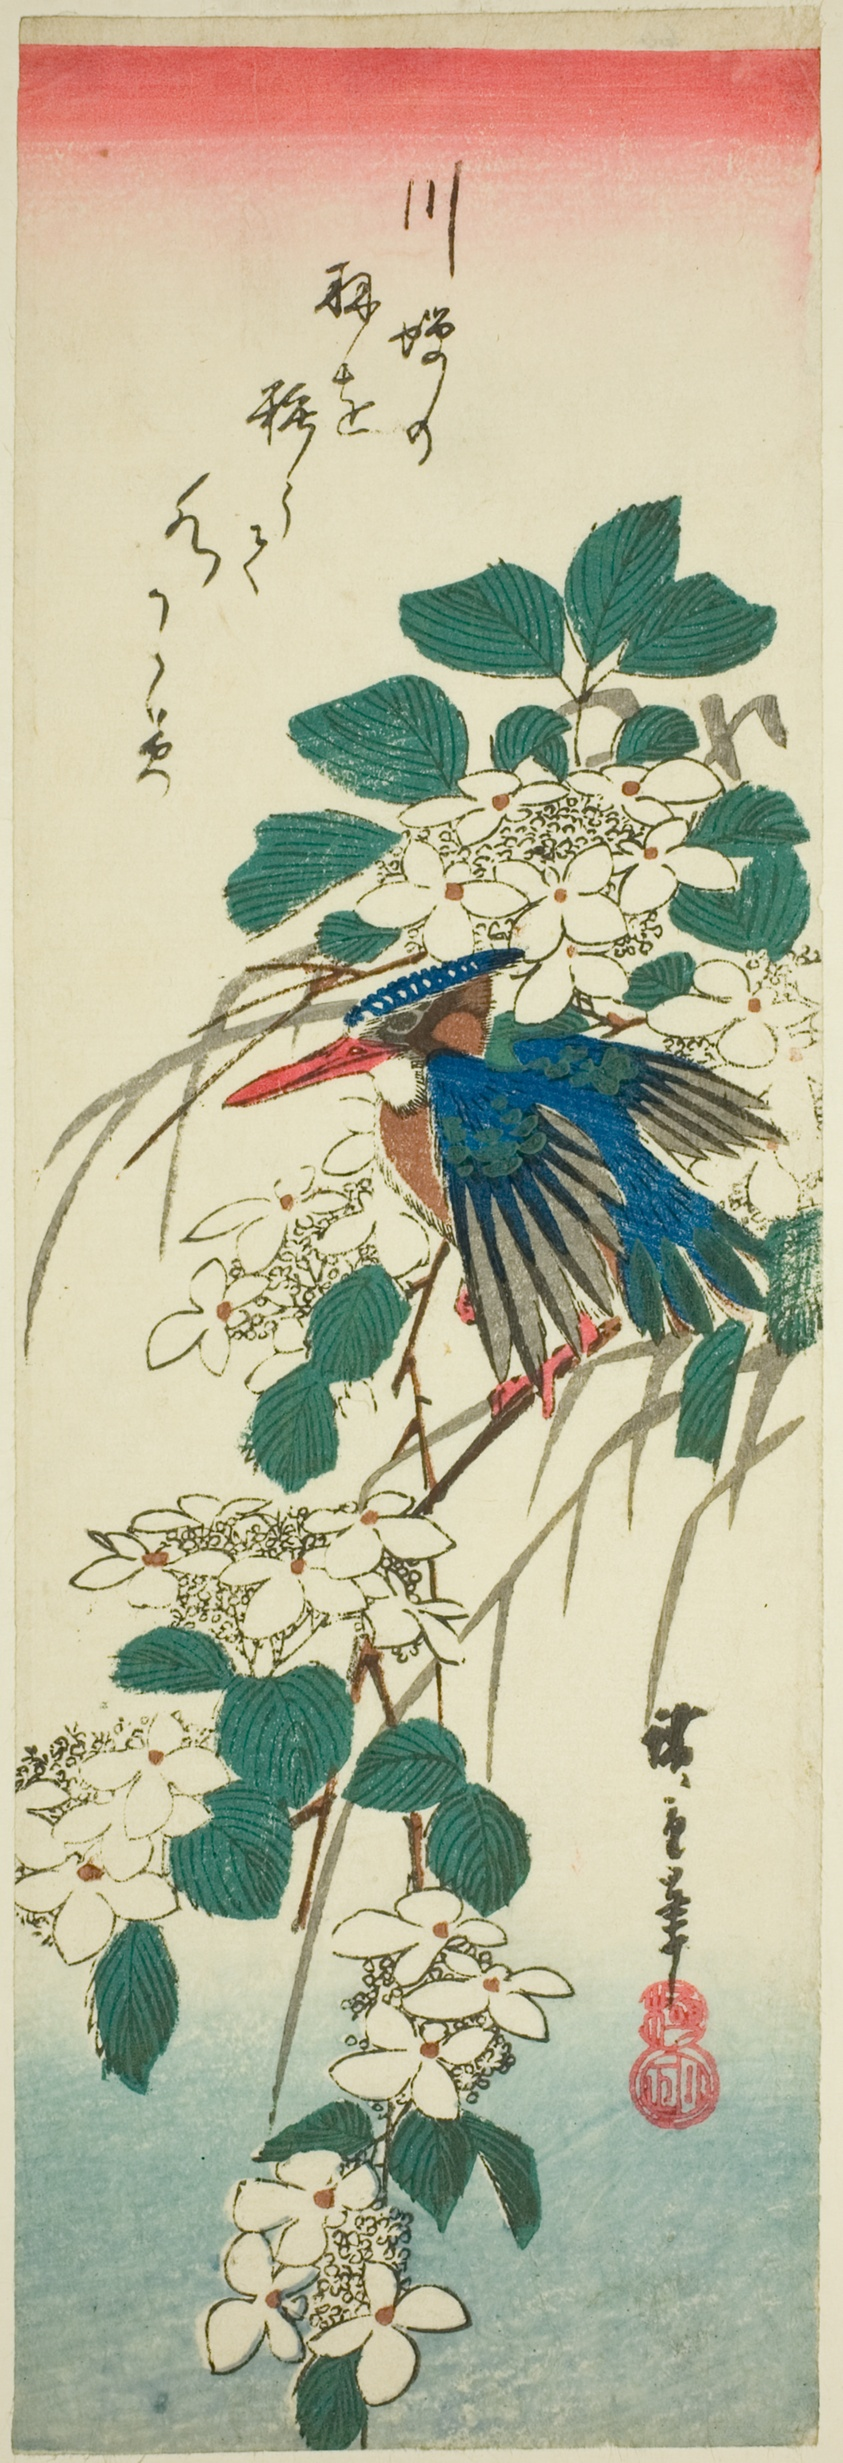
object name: Print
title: Kingfisher and viburnum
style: Japanese (culture or style)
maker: Utagawa Hiroshige 歌川 広重; Japanese, 1797-1858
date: 1840s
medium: Color woodblock print; chutanzaku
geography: Japan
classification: woodblock print; print; asian art